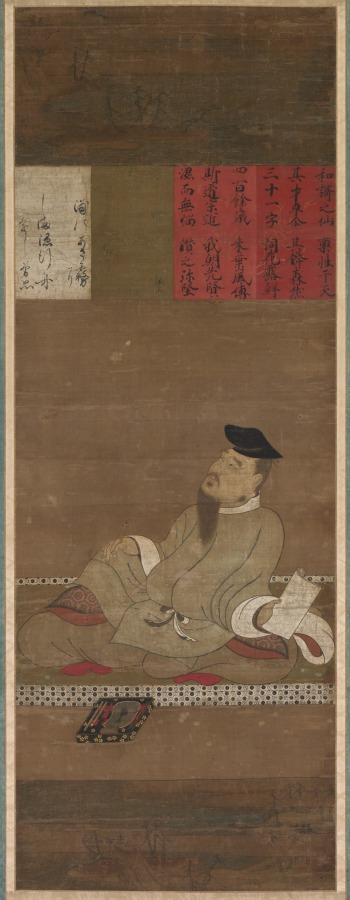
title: Kakinomoto no Hitomaro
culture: Japan, Kamakura period (1185–1333)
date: early 1300s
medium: hanging scroll; ink and color on silk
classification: Painting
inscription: 浦のあさ霧にしま隠れゆく舟をしぞ思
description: Among Japan’s greatest poets, Kakinomoto no Hitomaro’s (c. 660–724) portrait was often displayed at poetry competitions. Here, he gazes up at a falling cherry blossom, his writing box before him, brush and paper in his hands. A short biography and one of his poems are inked on painted rectangles meant to look like decorated papers. The first part of the poem has been mostly lost, but from what remains, it is possible to recognize it as Dimly, dimly in the morning mist that lies over Akashi Bay, my longings follow with the ship that vanishes behind the distant isle. —Translated by Robert H. Bower and Earl Roy Miner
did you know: The landscapes at the top and bottom of the painting depict Akashi Bay, with its famous pines along the shore, and a lone figure in a boat.